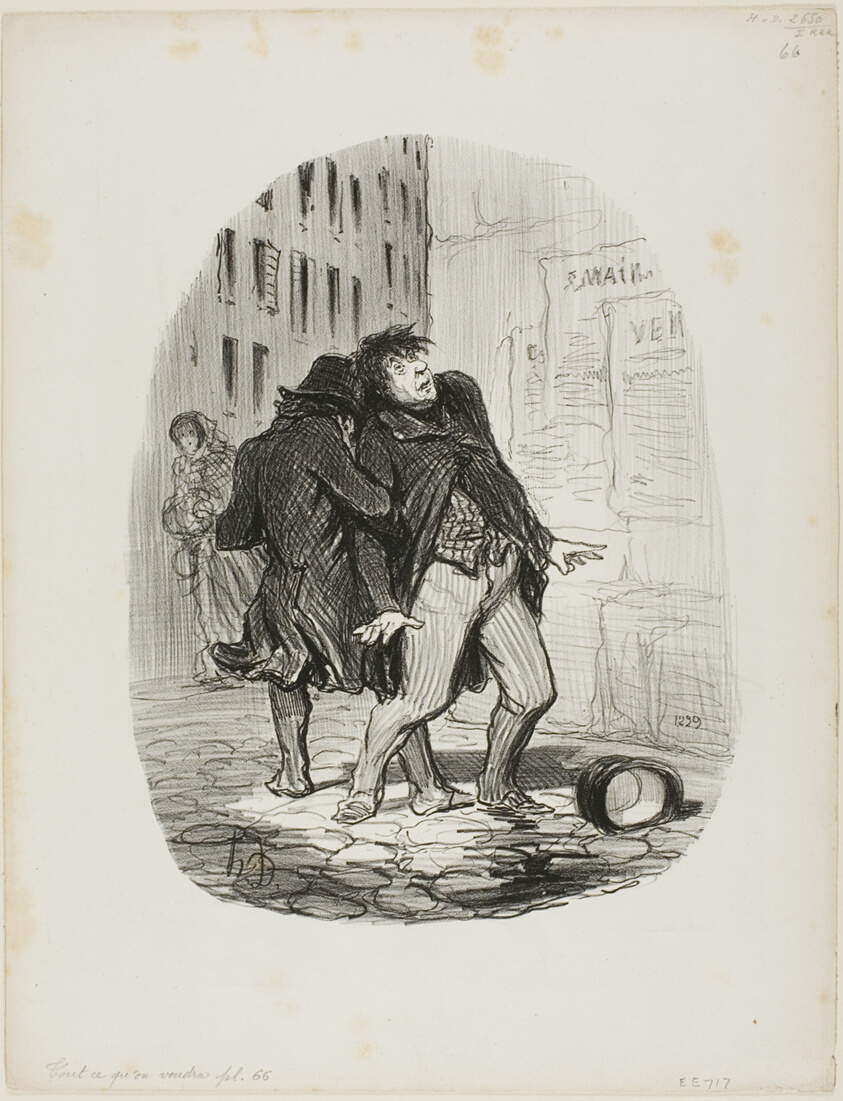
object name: Print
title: “- Tell me, my friend, all the people who walk in this area turn around... could it be that this is the politician's district?,” plate 66 from Tout Ce Qu'on Voudra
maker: Honoré Victorin Daumier; French, 1808-1879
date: 1850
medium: Lithograph in black on white wove paper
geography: France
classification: lithograph; print; prints and drawing